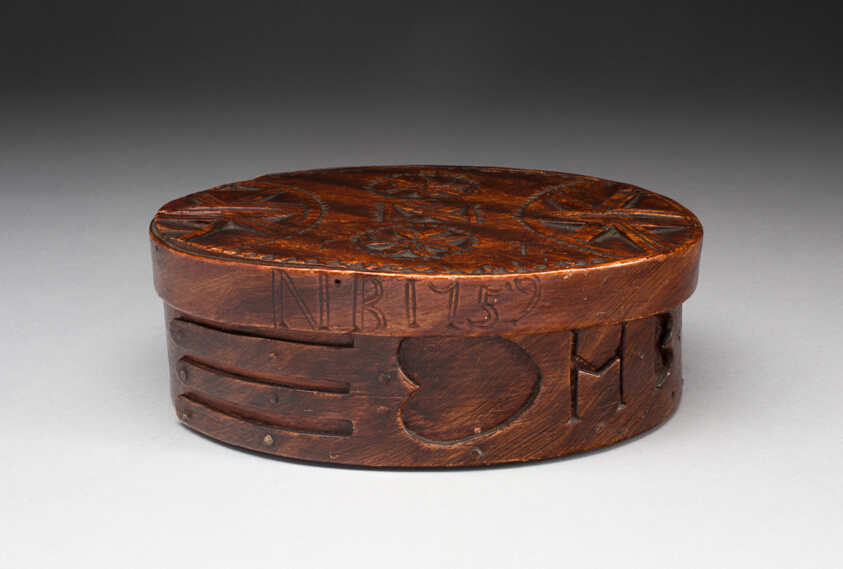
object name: Decorative Arts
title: Box with Lid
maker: Artist unknown (American, 18th century)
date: c. 1759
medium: White pine and hickory or ash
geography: United States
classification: case furniture; box; furniture; american decorative arts; american arts; decorative arts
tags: furniture